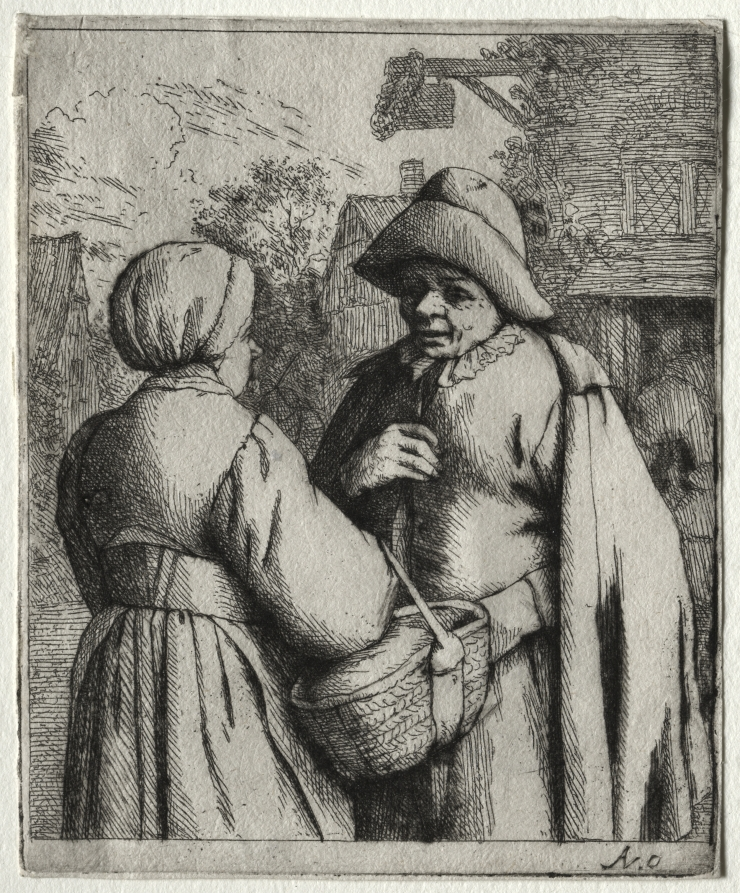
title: Man and Woman Conversing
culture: Netherlands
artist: Adriaen van Ostade (Dutch, 1610–1684)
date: c. 1671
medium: etching and drypoint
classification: Print